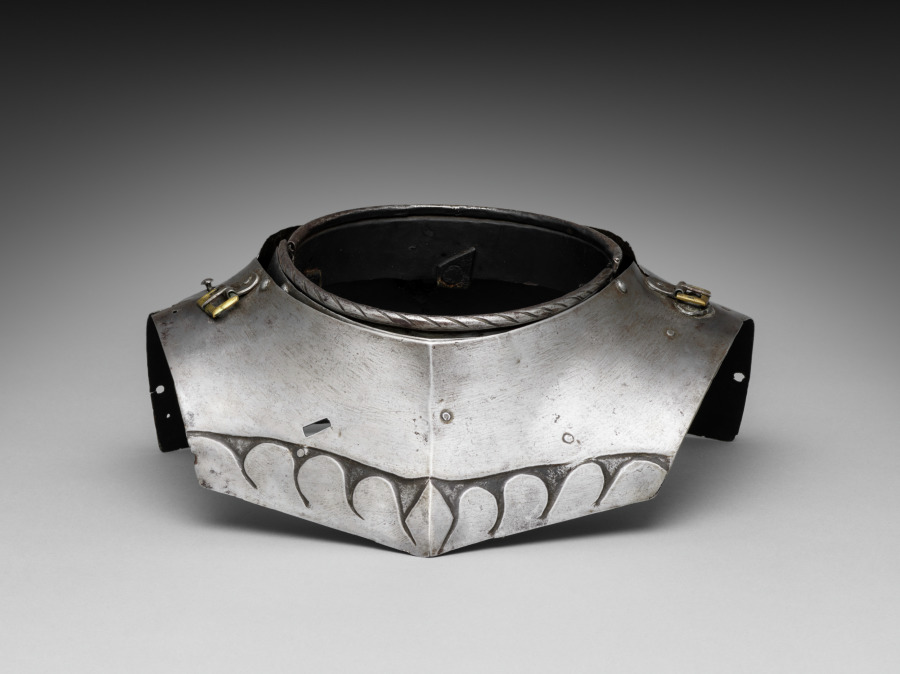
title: Gorget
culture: Germany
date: 1500s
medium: steel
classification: Arms and Armor